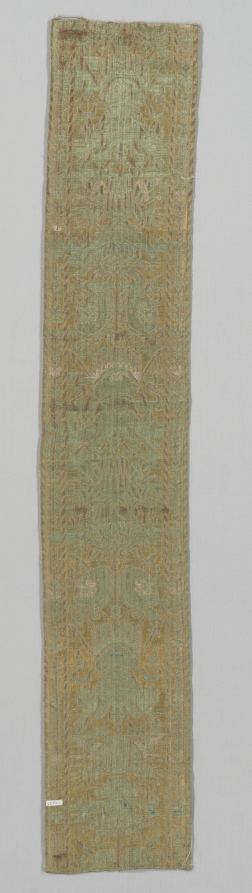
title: Silk Fragment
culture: Italy, 17th century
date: 1600s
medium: lampas weave, silk and metal thread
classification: Textile